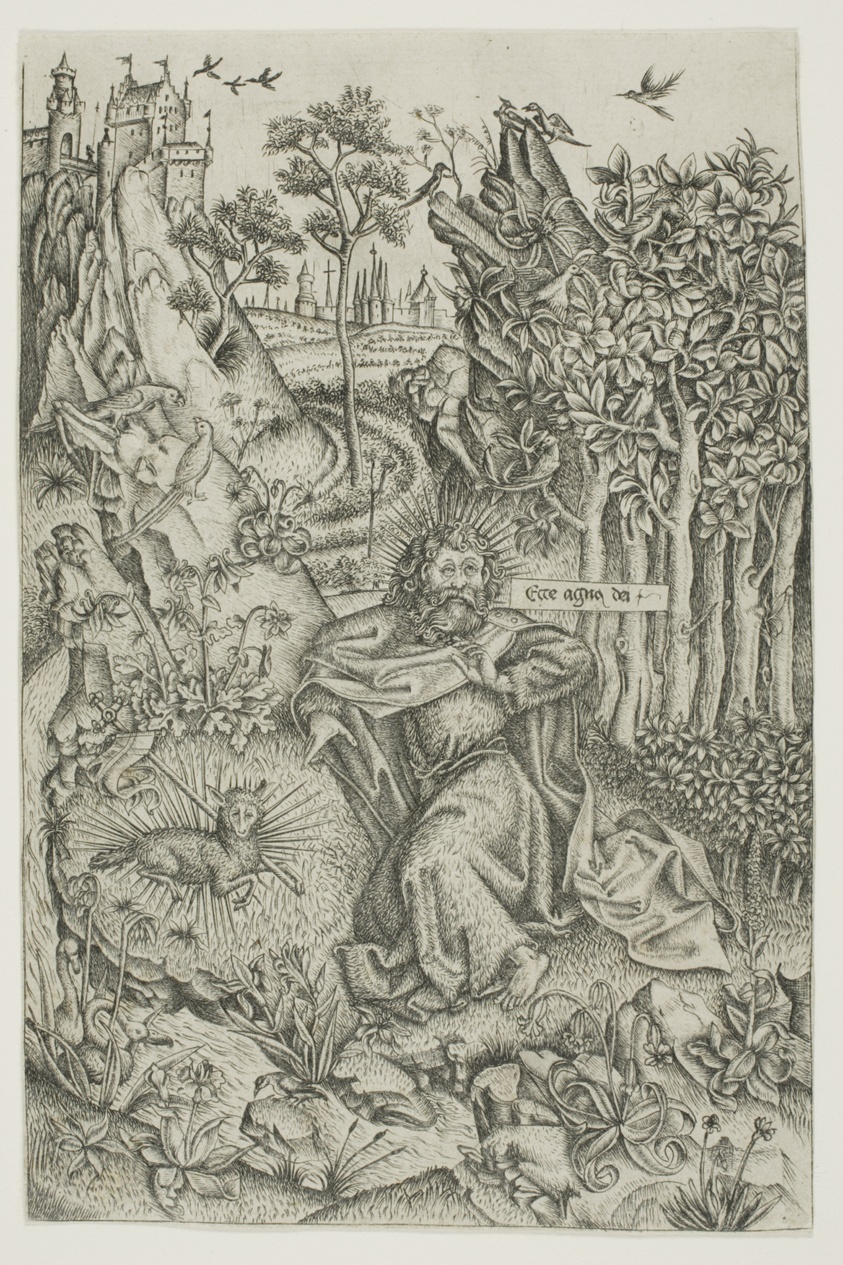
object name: Print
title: St. John the Baptist in the Wilderness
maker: Master of Saint John the Baptist (German, active c. 1450–1460)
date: c. 1450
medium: Engraving in black, with pen and ink, on ivory laid paper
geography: Germany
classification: engraving; print; prints and drawing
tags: saints, Christian subjects, mythology, prints and drawings